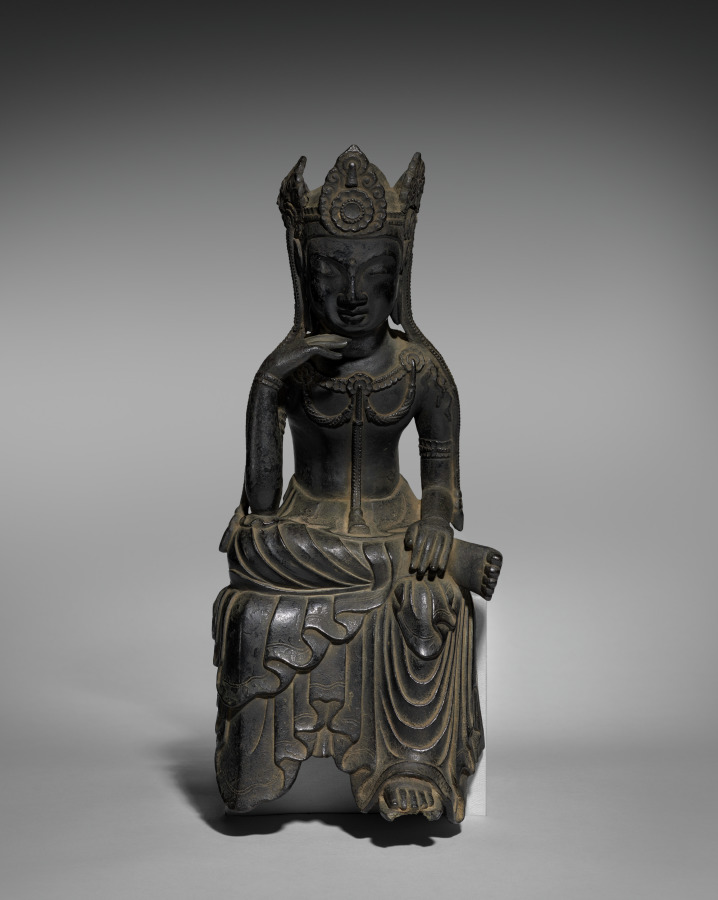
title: Buddha of the Future (Miroku Bosatsu)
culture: Japan, Asuka period (538–710)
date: late 600s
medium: cast bronze, incised, with traces of gilding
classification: Sculpture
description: Buddhism was introduced to Japan in the sixth century. For early Japanese devotees, Buddhism offered the promise of salvation through faith in the Buddha of the Future, who would appear at the end of the world. The concept of eternal salvation held particular resonance with the Japanese aristocracy, who became the staunchest supporters of this new faith. Small sculptures like this one, with its gentle grace and powerful presence, were popular devotional objects.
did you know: The Sanskrit name of this being, Maitreya, derives from the Sanskrit word for friend, mita.